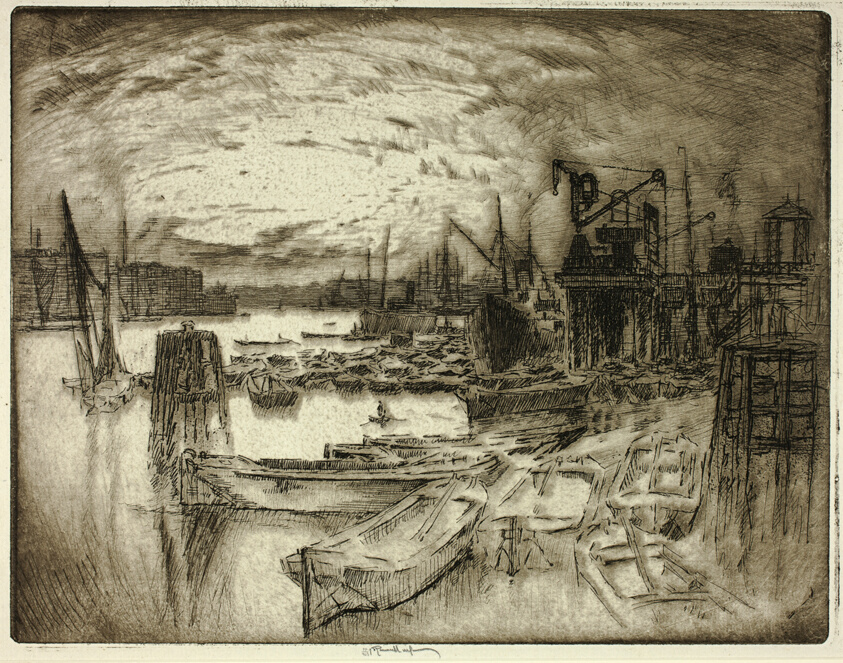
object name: Print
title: The Dock Head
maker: Joseph Pennell (American, 1857-1926)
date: 1905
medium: Etching and drypoint on ivory laid paper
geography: United States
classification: etching; print; prints and drawing